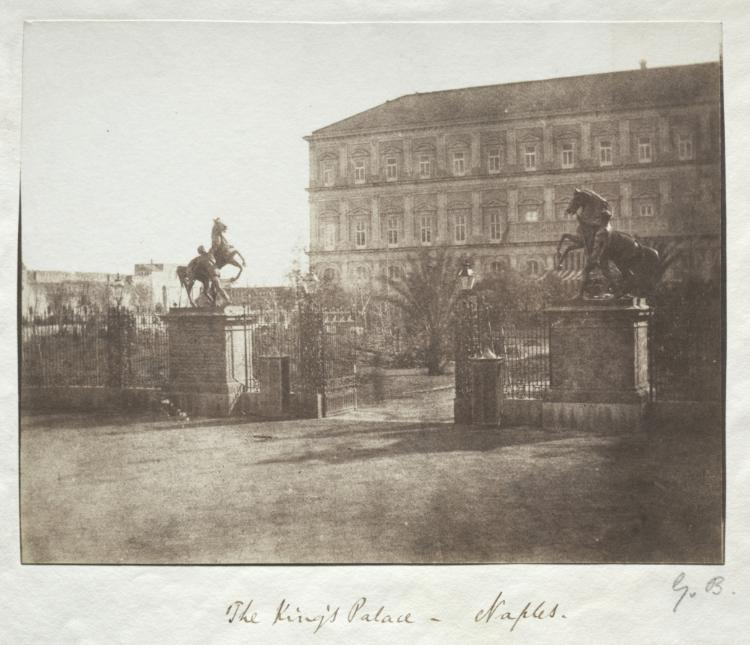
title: The King's Palace, Naples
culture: England, 19th century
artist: Reverend George Wilson Bridges (British, 1788–1863)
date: before 1852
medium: salted paper print from calotype negative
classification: Photograph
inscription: Written in pencil on recto of mount: "G.B."; "47 [circled]"; in brown ink: "83"; "The King's Palace---Naples."; in pencil on verso of mount: "83B"; "Later King Victor Emannuel III / of Italy--Abdicated 1946---"; in purple ink: "Prince of Naples / 1883,4."